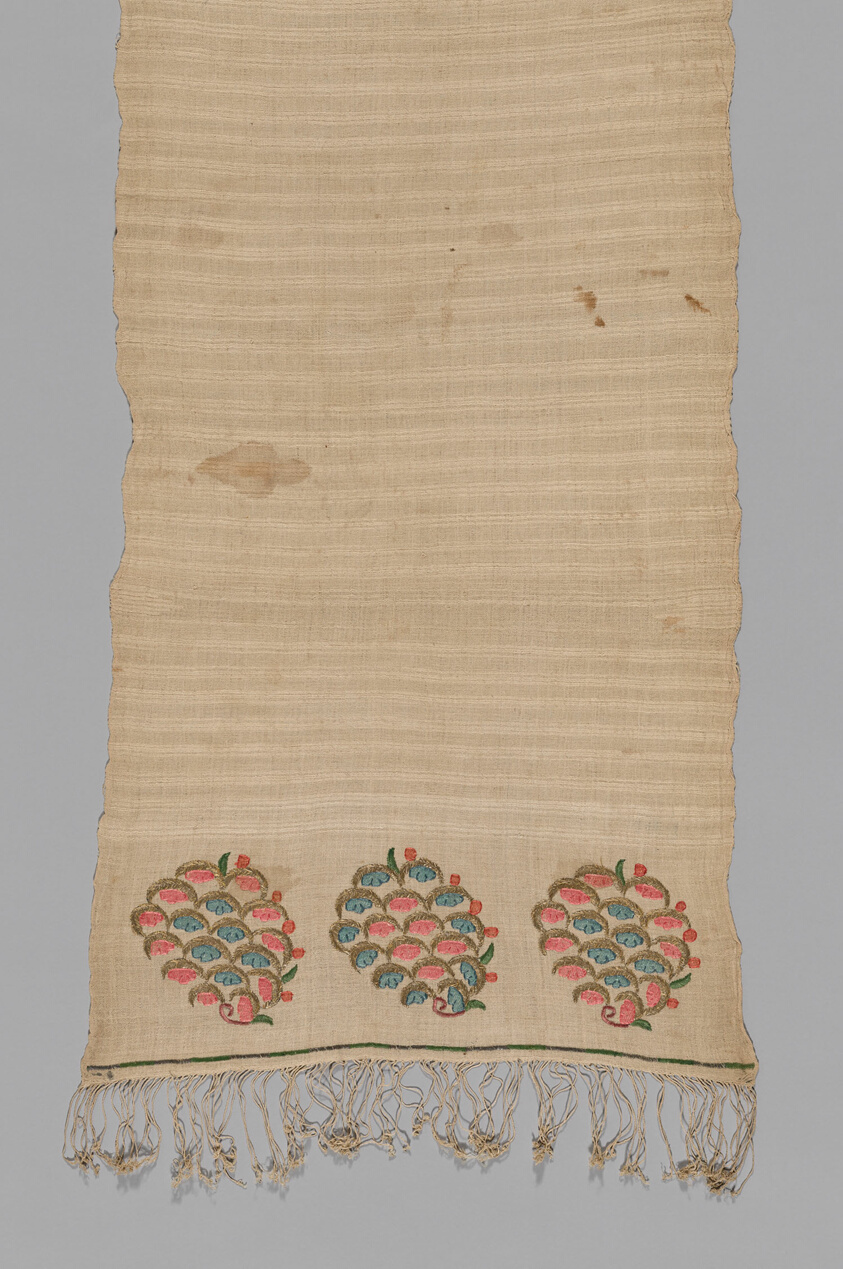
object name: Textile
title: Towel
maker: Turkey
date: 19th century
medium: embroidered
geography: Turkey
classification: textile; needlework (visual works); weaving